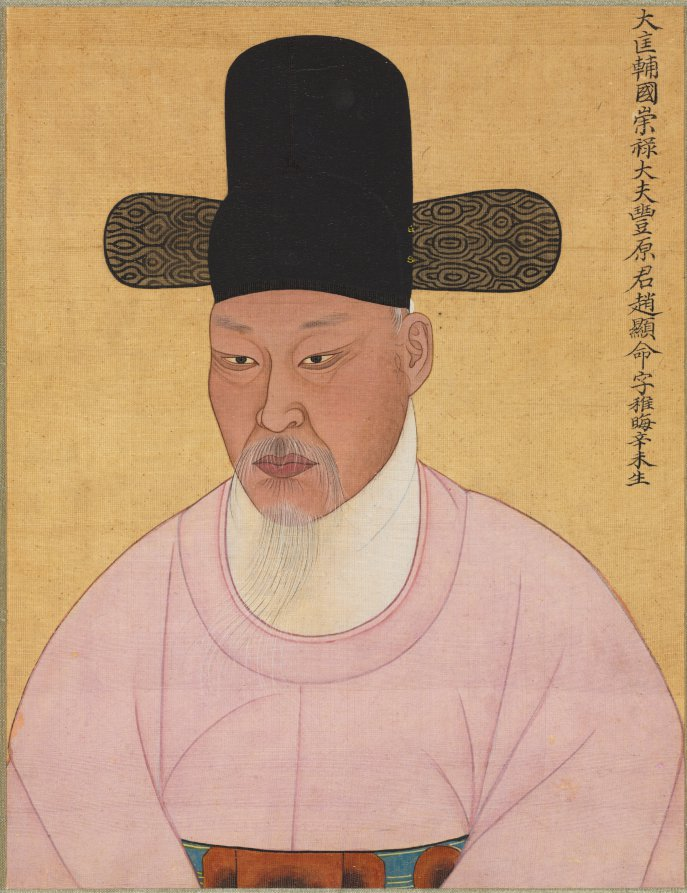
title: Cho Hyun-myeong from Punhyang Cho Family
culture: Korea, Joseon dynasty (1392–1910)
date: 1800s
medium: album painting, ink and color on silk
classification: Painting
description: These two portraits are of members of the Cho family, which originated from the area of Pungyang. Cho Jae-ho (1702-1762) on the left is the cousin of Cho Hyun-myeong on the right. Both were High State Councilors, called yeong-uijeong, and the Cho family ordered these two portraits as a family honor. Korean portraits were copied for sharing at each family Confucian ritual; similar portraits are still in the collection of the Cho family in Korea.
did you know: These two men belonged to the Pungyang Cho Clan, one of the most important political power houses in 18th-century Korea.